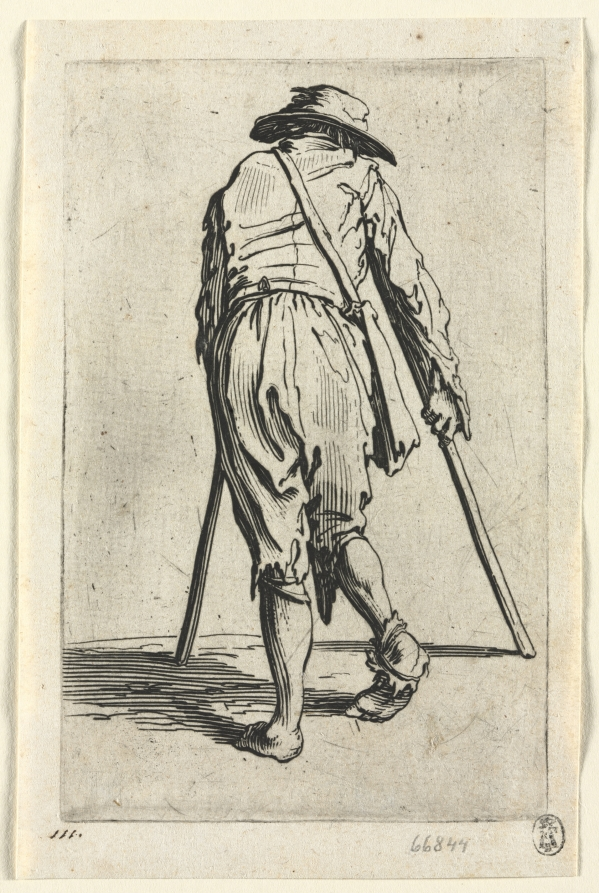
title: The Beggars: Beggar on Crutches, Wearing a Hat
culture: France, 17th century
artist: Jacques Callot (French, 1592–1635)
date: c. 1623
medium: etching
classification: Print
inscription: Inscribed lower left in pen and brown ink: "111."